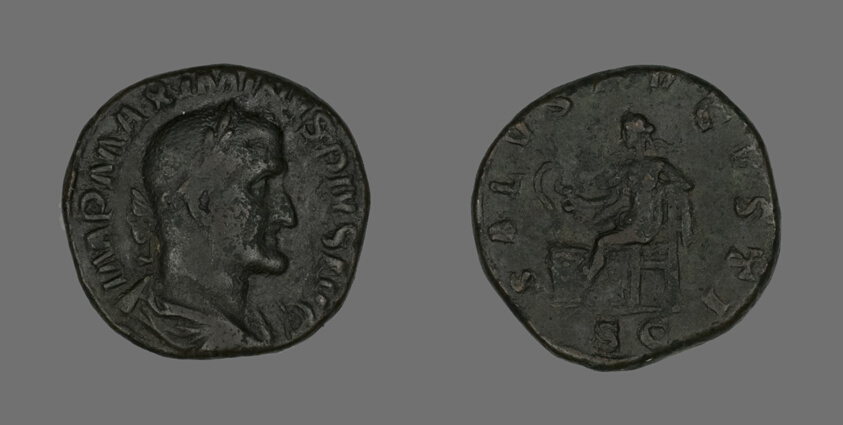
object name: Coin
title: Sestertius (Coin) Portraying Emperor Maximinus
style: roman (ancient, style or period)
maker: Roman, minted in Rome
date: 235-238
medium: Bronze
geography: Roman Empire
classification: coin; ancient art